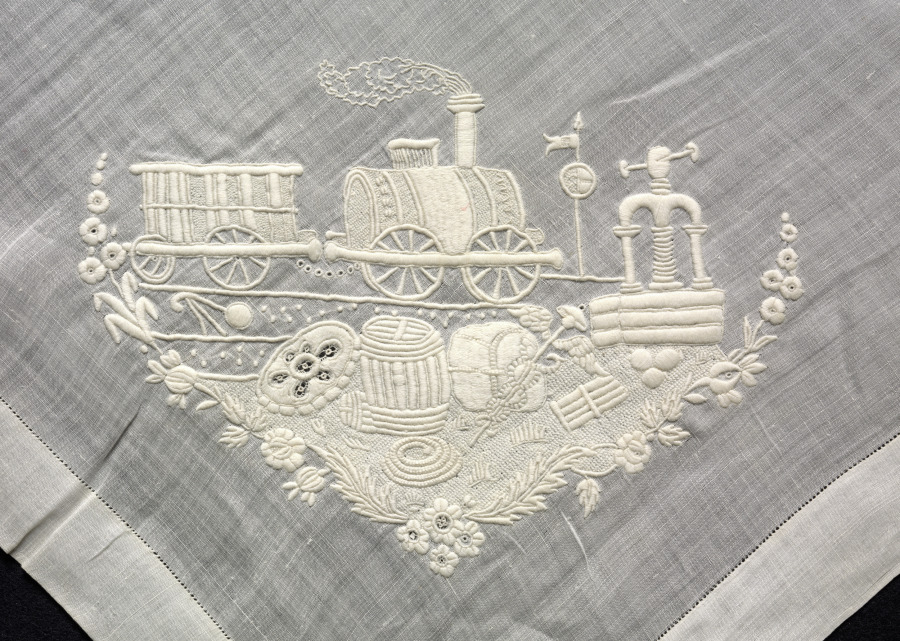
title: Embroidered Handkerchief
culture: Italy(?)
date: 1800s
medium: Plain weave linen, embroidered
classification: Embroidery